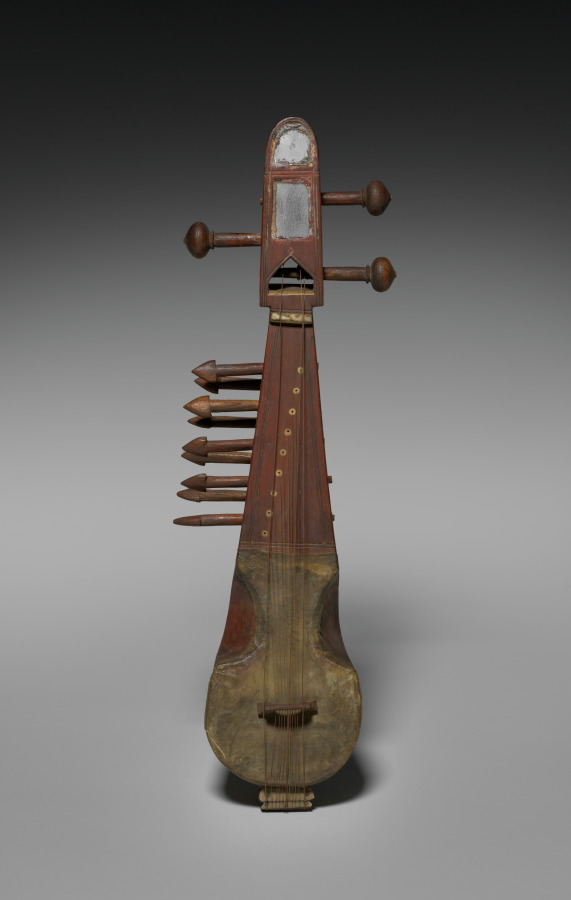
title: Sarangi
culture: India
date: 1800s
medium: Wood with traces of pigment, parchment, bone or ivory, mirrored glass, and copper strings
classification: Musical Instrument